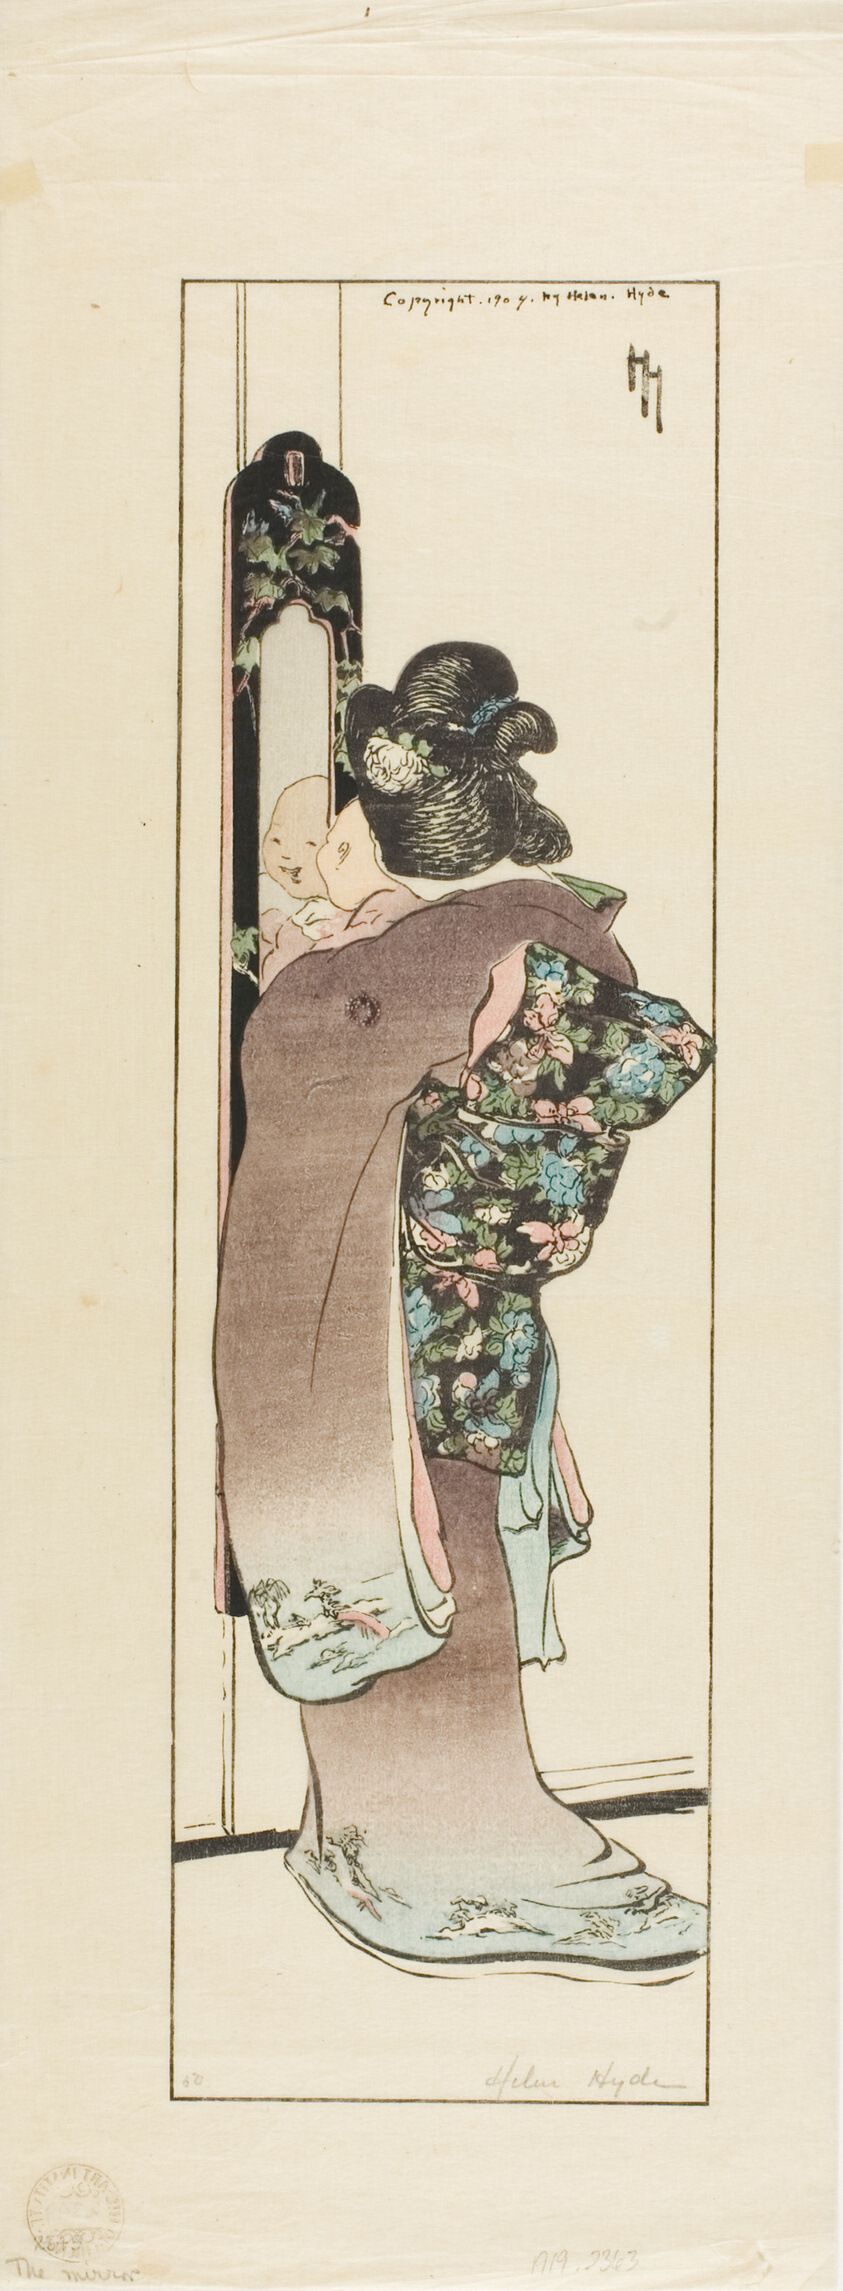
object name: Print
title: The Mirror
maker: Helen Hyde (American, 1868-1919)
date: 1904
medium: Color woodcut on cream Japanese paper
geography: United States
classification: woodcut; print; prints and drawing